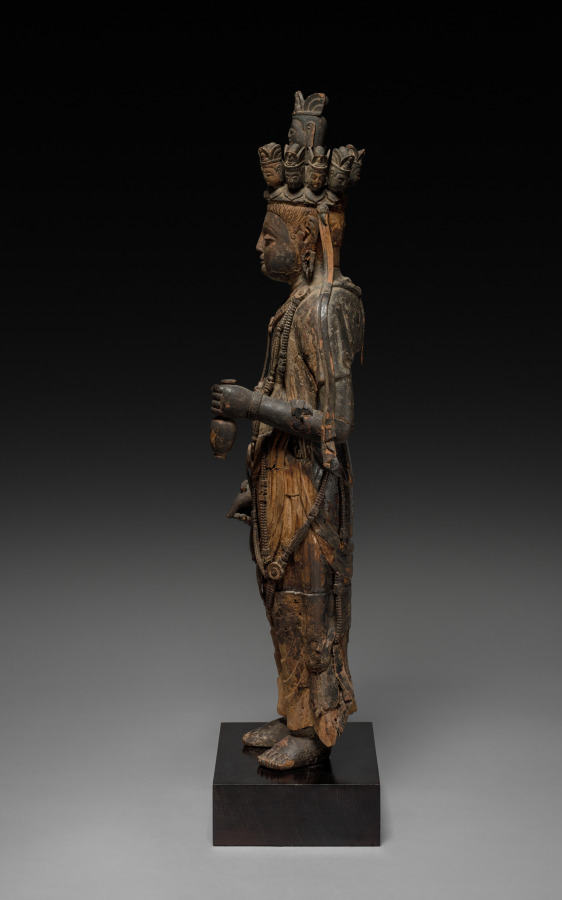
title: Eleven-Headed Guanyin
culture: China, Tang dynasty (618–907)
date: late 600s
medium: wood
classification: Sculpture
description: Guanyin, the bodhisattva of infinite compassion, can be identified by his attributes, carrying a tiny Amida Buddha in his crown, and holding a bottle with the nectar of life in his left hand. The eleven-headed Guanyin, in particular, has his eyes and ears open in all directions to hear, see, and help all those who are in distress. The garment and jewelry of this graceful figure remind us that the historic Buddha Shakyamuni was originally an Indian prince before he reached enlightenment. Upon his death, he entered nirvana, an eternal state free of desire and suffering, outside the realm of birth, death, and rebirth. The dating and attribution of the figure as being from China needs further study.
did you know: The sculpture was made of different types of wood with different grain sizes and patterns, which are connected with wood pegs and glue.